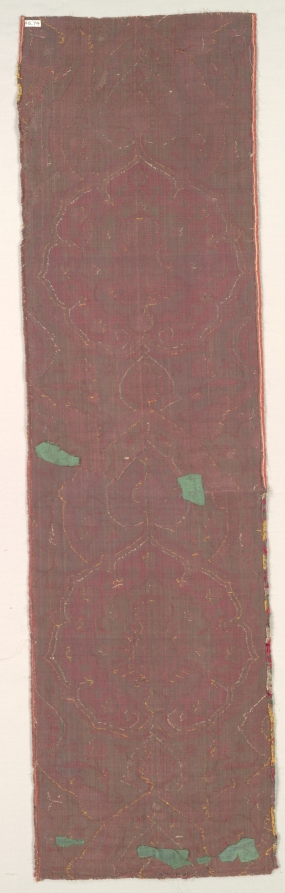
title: Brocaded Velvet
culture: Turkey, early 16th Century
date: c. 1500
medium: velvet: silk, brocaded with gold and silver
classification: Velvet